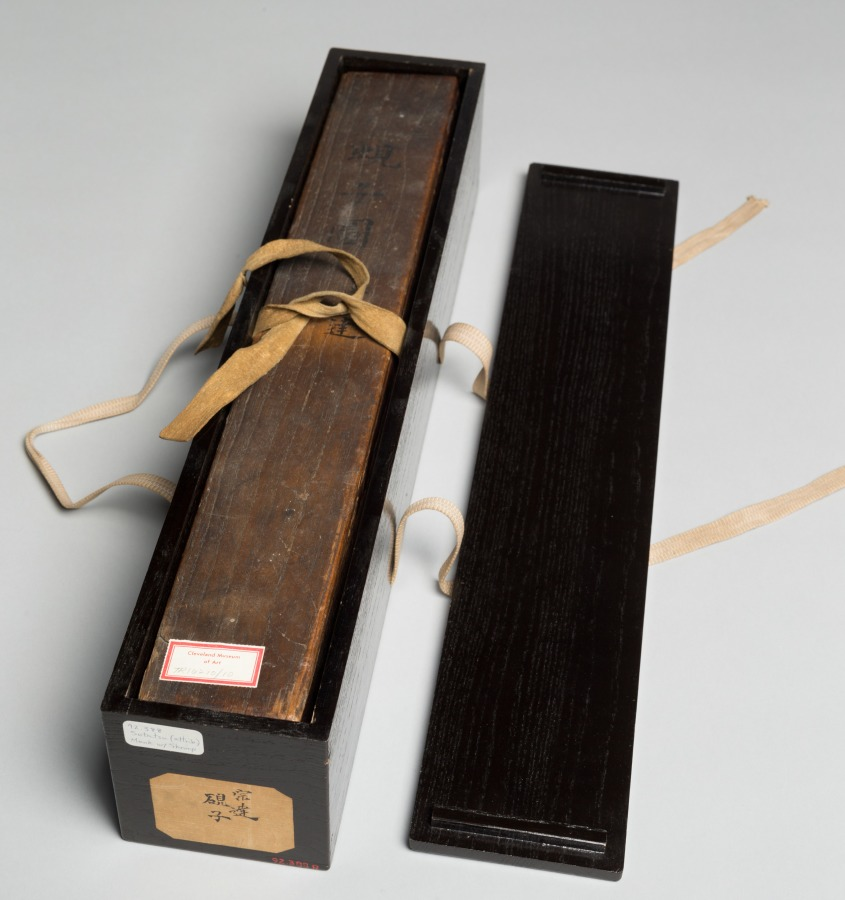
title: Kenshu, Monk with Shrimp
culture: Japan, Edo period (1615–1868)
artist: studio of Tawaraya Sōtatsu (Japanese, c. 1570–c. 1640)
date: c. 1600–1640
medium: hanging scroll; ink on paper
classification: Painting